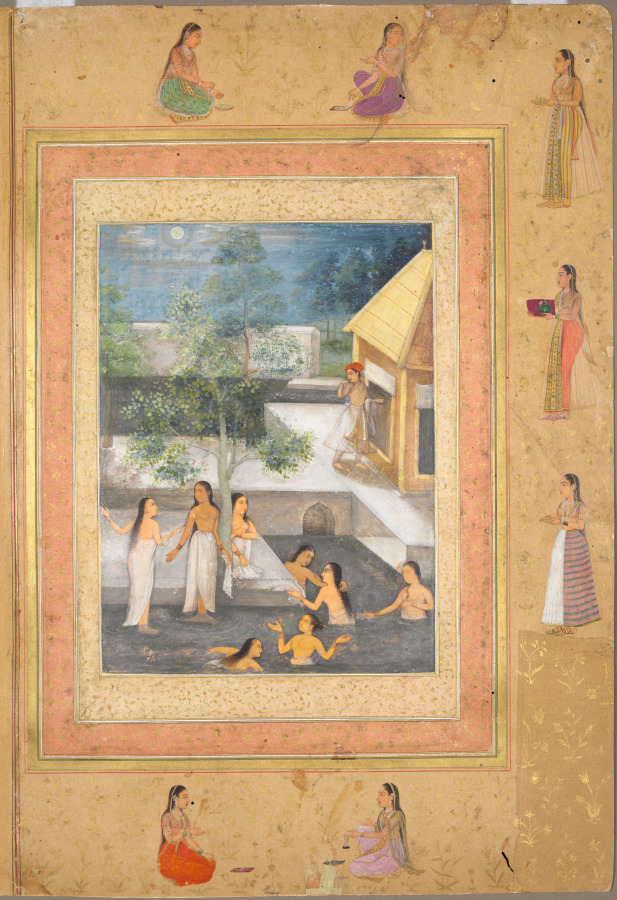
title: Leaf from the Late Shah Jahan Album: Harem Night-Bathing Scene (recto); Calligraphy Framed by an Ornamental Border of Flowers and Birds (verso)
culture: Mughal India, court of Shah Jahan (reigned 1628–58)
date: c. 1650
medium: Gum tempera, ink, and gold on paper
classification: Painting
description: The subject of women bathing persisted throughout the 1500s and into the 1600s. Akbar’s grandson Shah Jahan—the Mughal emperor who built the Taj Mahal—continued to support the work of artists in the imperial atelier. His taste was more formal and subdued, without as much interest in illuminations of fantastic tales. This scene is a single painting mounted in an album. The white marble terraces glow under the moonlight. An attendant carrying a cloth over one arm looks on with awe at the beauty of the scene. He is probably a eunuch, since men were not permitted to serve in the women’s quarters of a Mughal palace.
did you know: The lone male figure points to his mouth in a gesture of astonishment, perhaps at the beauty of the scene.